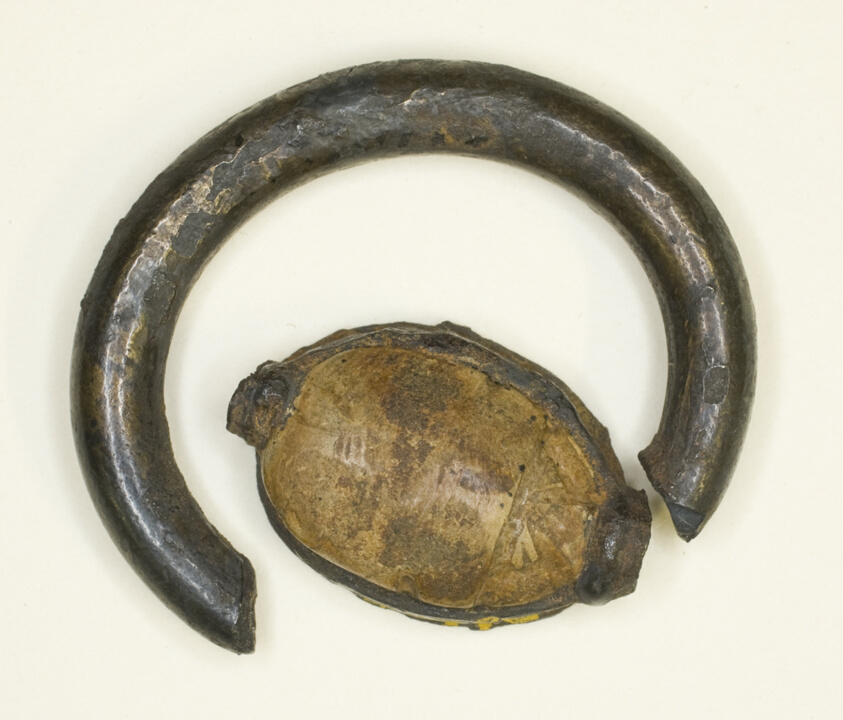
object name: Costume and Accessories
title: Ring: Cowroid with Sistrum and Pendant Uraeui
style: egyptian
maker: Egyptian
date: New Kingdom, Dynasty 18 (about 1350 BCE)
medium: Electrum, steatite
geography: Egypt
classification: gold; metal; jewelry; ancient art; costume